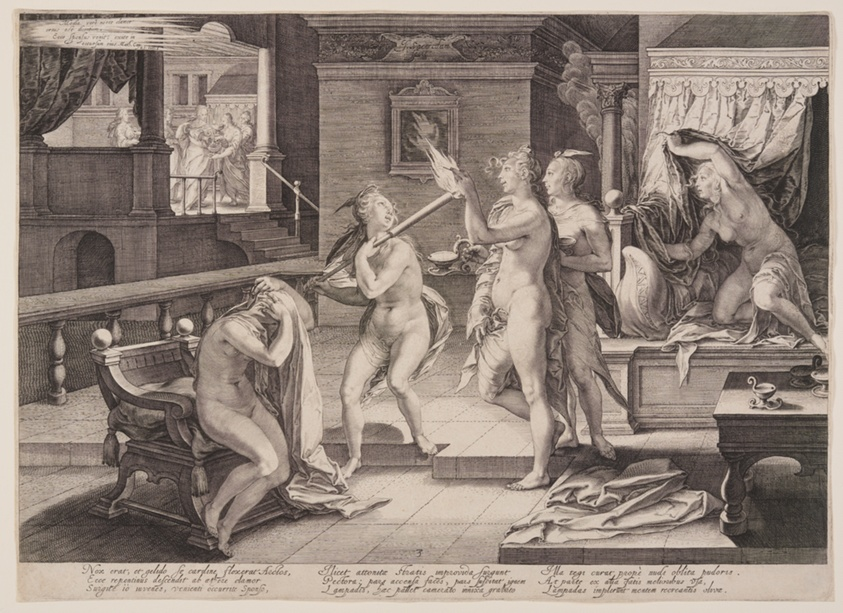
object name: Print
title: Virgins Receiving their Lamps, from Parable of the Wise and Foolish Virgins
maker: Jan Saenredam (Dutch, 1565–1607)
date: 1606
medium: Engraving on ivory laid paper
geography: Netherlands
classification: engraving; paper; print; prints and drawing